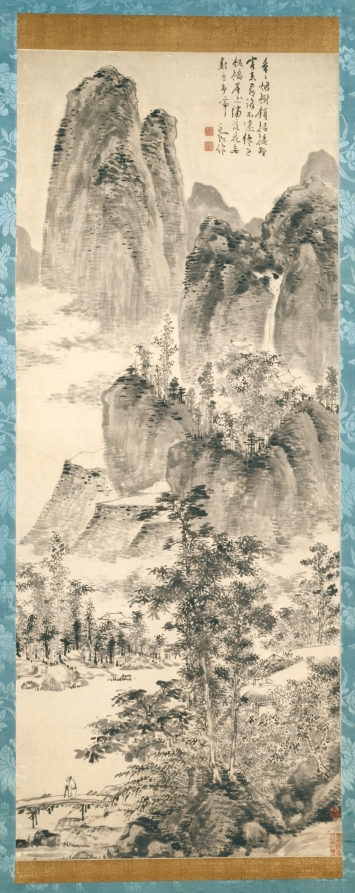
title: Looking for a Monastery in the Misty Mountains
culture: China, Ming dynasty (1368–1644)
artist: Chen Chun (Chinese, 1483–1544)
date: 1500–1544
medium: hanging scroll, ink on paper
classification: Painting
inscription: Artist's inscription, signature, and 2 seals: Row after row of misty trees envelop the Buddhist Monastery./ But the rustic who comes to find it will not lose his way./ Just across the wooden bridge, the dusty world is cut off;/ Among the countless falling petals, birds are singing confusedly. Daofu 道複 composed [this]. [seals] Fufu shi 復甫; Baiyang shanren 白陽山人. trans. WKH/LYSL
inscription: 3 additional unidentified seals.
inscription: 1 additional unidentified seal on the back of the mounting.